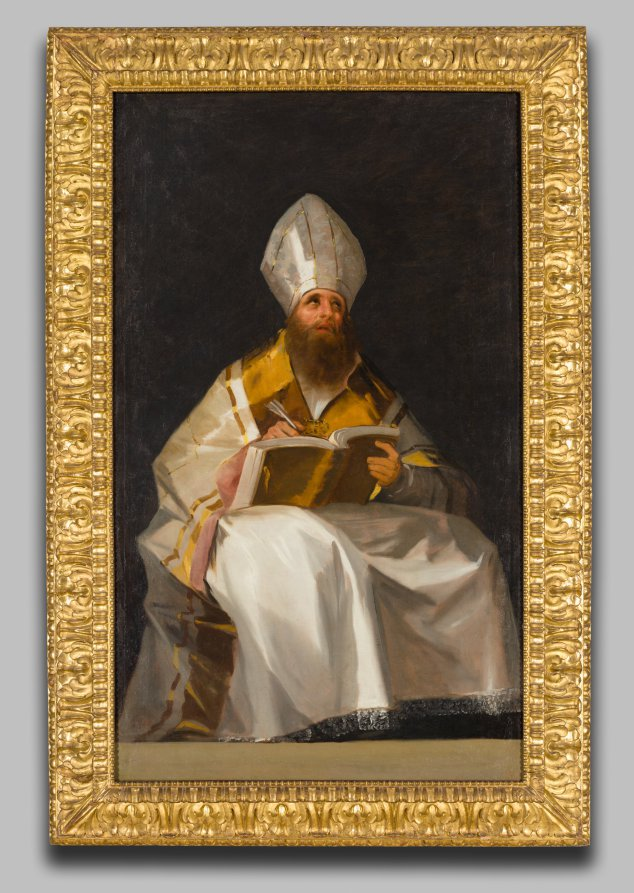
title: Saint Ambrose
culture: Spain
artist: Francisco de Goya (Spanish, 1746–1828)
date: c. 1796–99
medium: oil on canvas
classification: Painting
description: This work belongs to a series depicting Ambrose, Jerome, Augustine, and Gregory, key figures of early Catholicism. Saint Ambrose (about AD 340–391), the bishop of Milan, resolved important theological conflicts within the church and worked effectively with advocates of Roman paganism. The low viewpoint and large scale suggest that this painting hung high on the wall of a religious institution, but its original location remains unknown. In the late 1700s, Spain expelled all the Jesuits and sparked a transformation of the church. Many of these reformers turned back to early church history for inspiration, and this painting was probably commissioned by one of these new organizations.